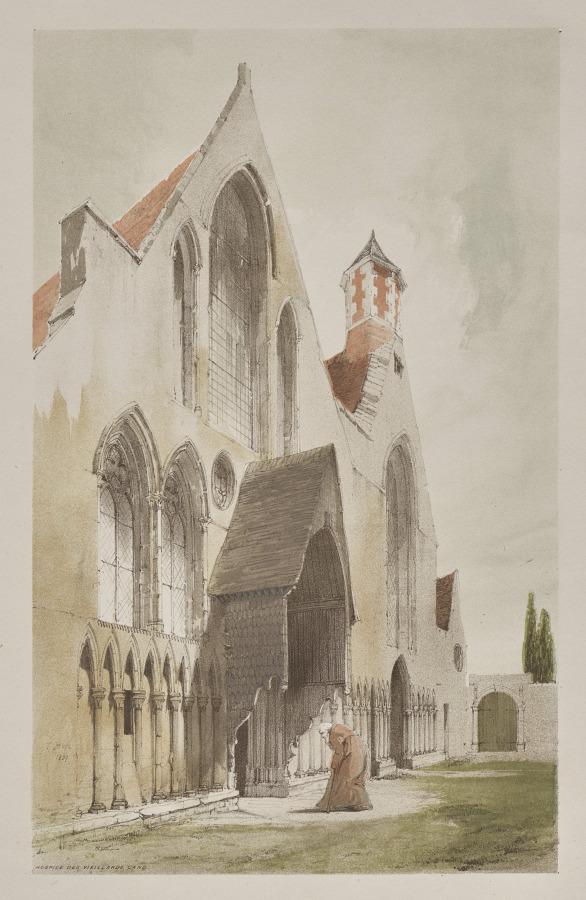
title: Picturesque Architecture in Paris, Ghent, Antwerp, Rouen: Hospice des Vieillards, Ghent, Belgium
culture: England, 19th century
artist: Thomas Shotter Boys (British, 1803–1874)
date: 1839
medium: lithograph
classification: Portfolio